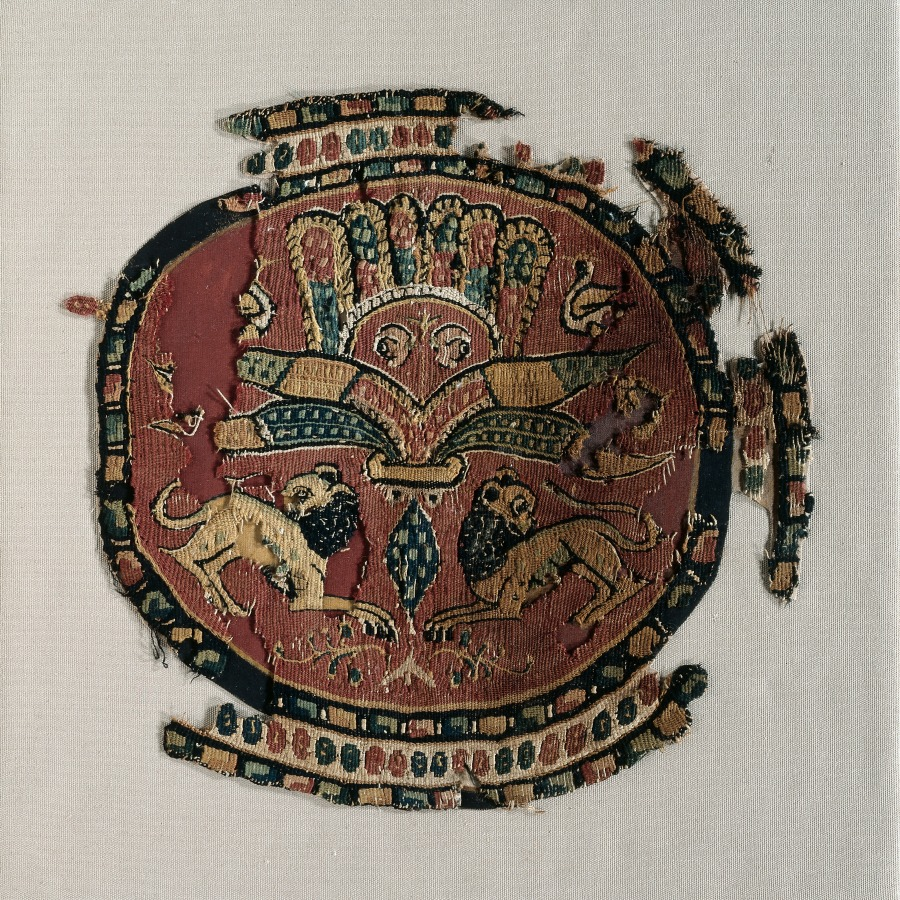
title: Lions from a Tunic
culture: Egypt, Islamic Abbasid period, 8th - 9th Century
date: c. 800s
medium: tapestry weave with supplementary weft wrapping; undyed linen and dyed wool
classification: Textile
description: The royal lions and jeweled border in this colorful roundel, originally from a tunic, conveyed power and wealth. The symmetrical design with lions and ducks flanking the central palmette (fan-shaped plant form) indicates that the pattern was copied from a costlier silk textile woven on a loom that automatically repeated the design in mirror-image symmetry.